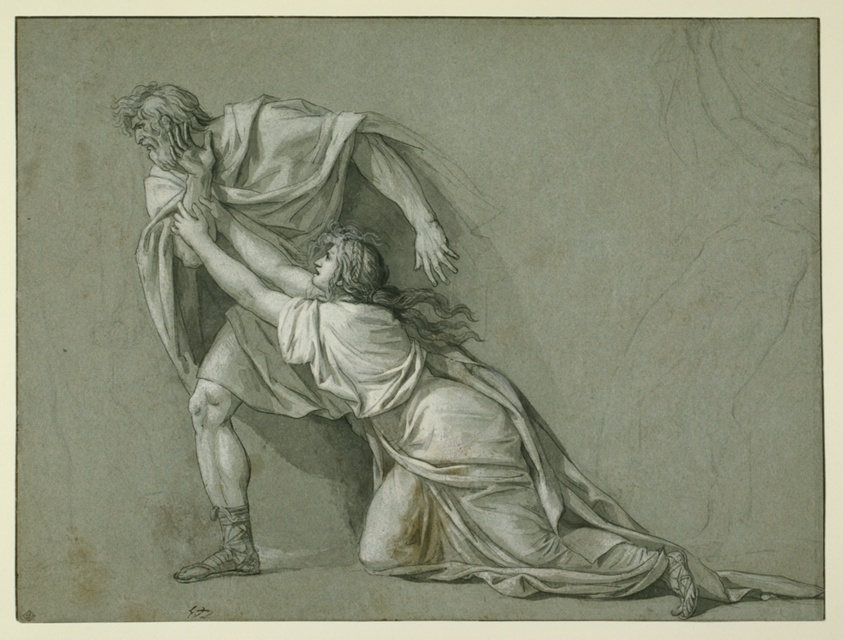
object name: Drawing and Watercolor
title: The Departure of Marcus Attilius Regulus for Carthage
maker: Jacques-Louis David; French, 1748-1825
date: 1785/86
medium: Pen and black ink and brush and black ink wash and opaque white watercolor with black chalk and touches of brown watercolor on blue laid paper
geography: France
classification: pen and ink drawings; drawings (visual works); prints and drawing